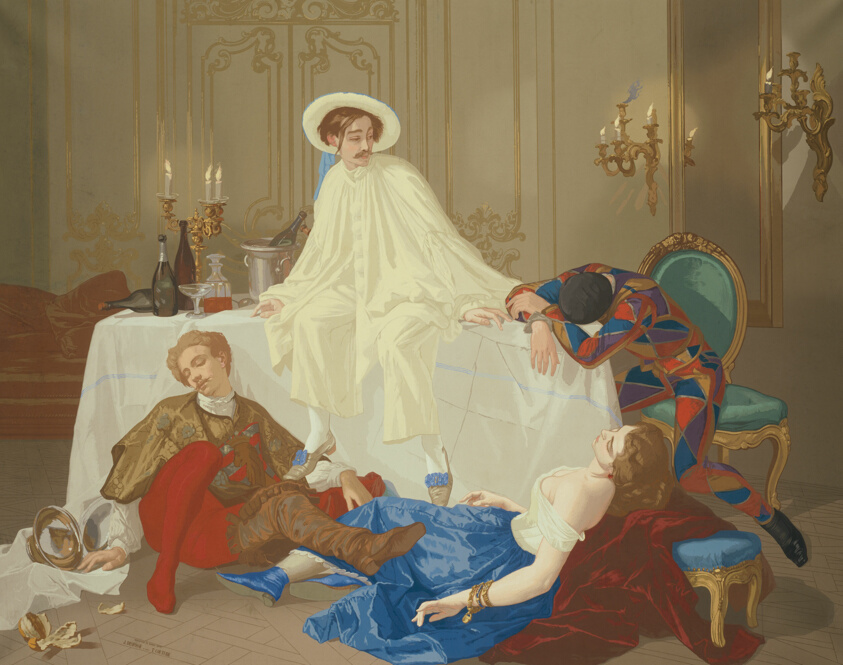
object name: Print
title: The Supper after the Masked Ball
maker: Thomas Couture (French, 1815-1879); printed and manufactured by Jules Desfossé (French, 1816-1889)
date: c. 1855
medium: Woodcut with painted and stenciled additions on tan wove paper, laid down on fabric, and stretched on a wooden stretcher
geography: France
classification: woodcut; print; prints and drawing